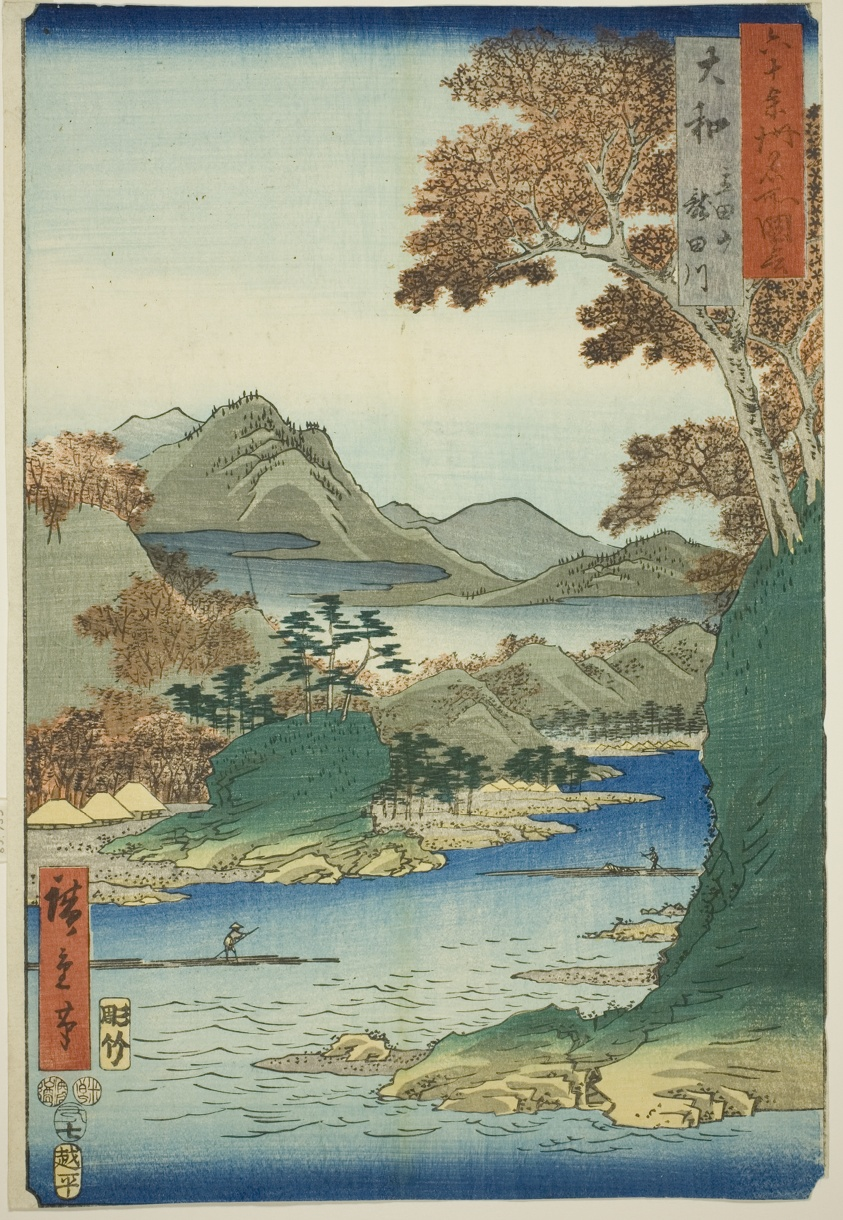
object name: Print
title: Yamato Province: Tatsuta Mountain and Tatsuta River (Yamato, Tatsutayama, Tatsutagawa), from the series "Famous Places in the Sixty-odd Provinces (Rokujuyoshu meisho zue)""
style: Japanese (culture or style)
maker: Utagawa Hiroshige 歌川 広重; Japanese, 1797-1858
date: 1853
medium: Color woodblock print; oban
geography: Japan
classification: woodblock print; print; asian art